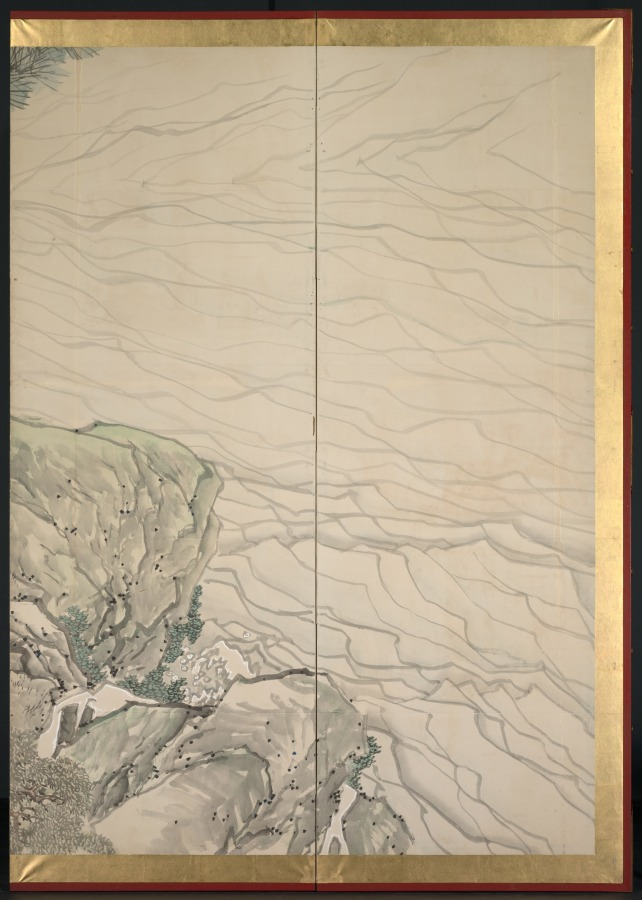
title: Tiger Family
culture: Japan, Edo period (1615–1868)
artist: Kishi Ganku (Japanese, 1749/56–1838)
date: early 1800s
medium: One of a pair of six-panel folding screens; ink and color on paper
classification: Painting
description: By the time this self-taught painter reached his thirties, his paintings were keenly sought after by Kyoto’s sophisticated patrons, including members of the imperial family. Judging from the surviving works, his supporters delighted in the colorful, auspicious imagery of Chinese historical figures, blossoming plum trees, cranes, peacocks, roosters, and especially tigers. Kishi Ganku was originally from the coastal town of Kanazawa, but relocated to Kyoto to work for the Arisugawa family. His work incorporates stylistic elements from the Kano school, the Maruyama school, and works by the Chinese artist Shen Nanping (1682–1760).